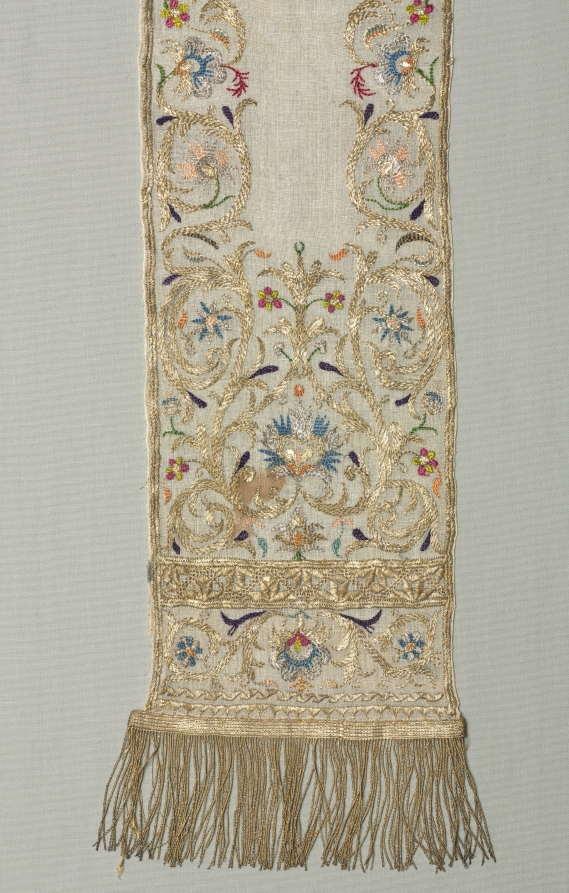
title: Headdress (beniqa)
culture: Africa, North Africa, Algeria, Algerian embroiderer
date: 1800s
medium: Linen, silk, and metal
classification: Embroidery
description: Beniqa were stylish headdresses that women wore when visiting the hammam (steam bath). The linen fabric absorbed the damp from their wet hair. With its gold and silver metal thread, shimmering spangles, and brightly colored threads forming flowers and vines, this beniqa was a ceremonial garment worn for the ritual bath before a Jewish woman’s wedding; it was also part of her dowry. After toweling off her hair, a woman made two braids, which she would then twist into the cap’s fabric and tie on her head, with the gold-fringed ends trailing down.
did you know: Slender gray lines made in pencil or chalk trace out unstitched designs on this elaborate ritual cap.